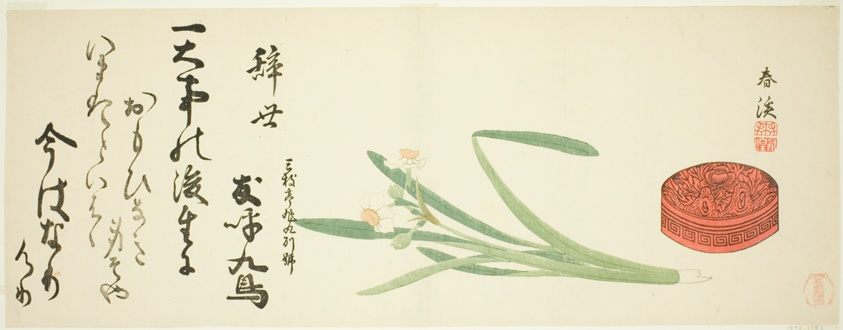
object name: Print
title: Narcissus and lacquer box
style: Japanese (culture or style)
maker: Mori Shunkei (Japanese, active c. 1820s–1830s)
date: c. 1820s/30s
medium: Color woodblock print; nagaban surimono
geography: Japan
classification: print; asian art